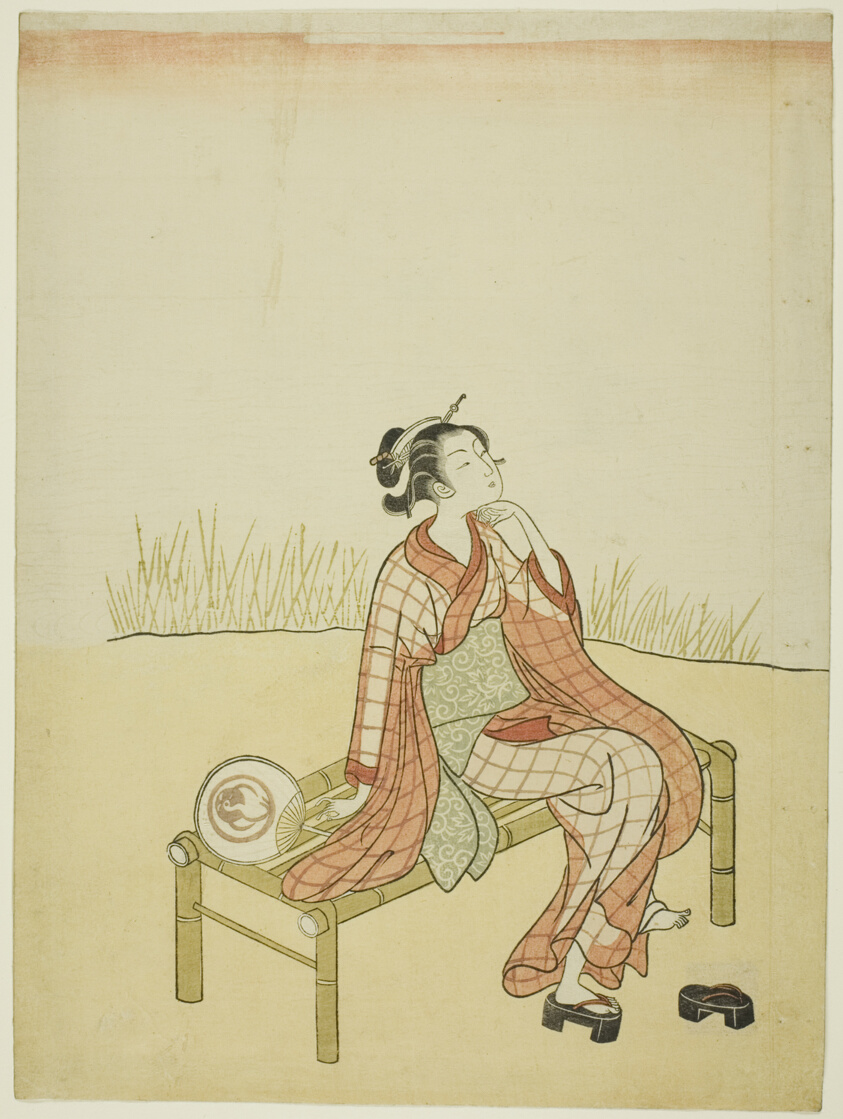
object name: Print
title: By the Stream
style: Japanese (culture or style)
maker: Attributed to Suzuki Harunobu 鈴木 春信; Japanese, 1725 (?)–1770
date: c. 1765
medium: Color woodblock print; left sheet of chuban diptych (right sheet: 1925.2032)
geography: Japan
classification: woodblock print; print; asian art